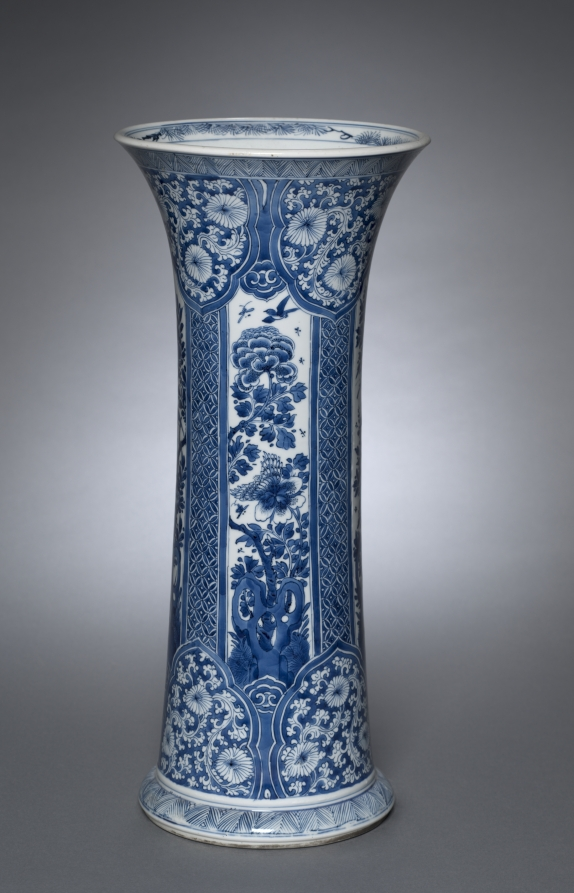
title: Vase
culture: China, Jiangxi province, Jingdezhen kilns, Qing dynasty (1644–1911), Kangxi reign (1662–1722)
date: 1662–1722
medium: porcelain with underglaze blue decoration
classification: Ceramic